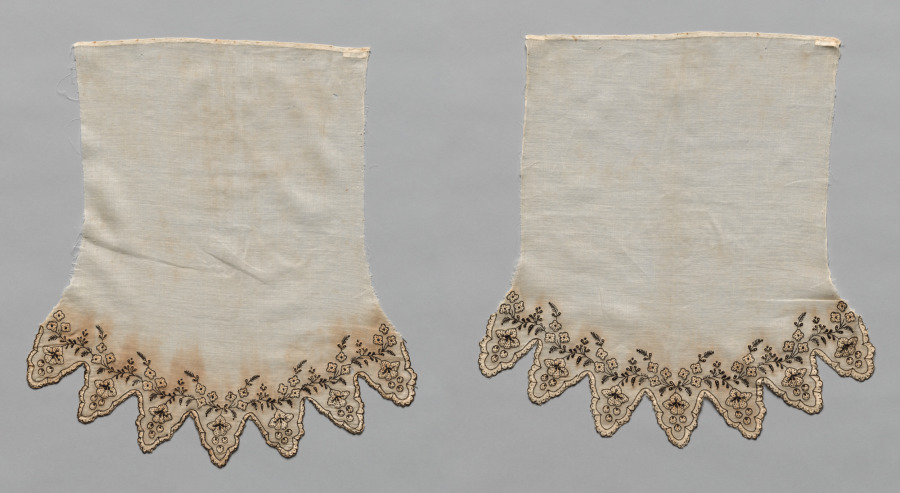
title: Pair of Sleeves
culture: America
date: 1800s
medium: Plain weave cotton with appliqué and embroidery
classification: Embroidery